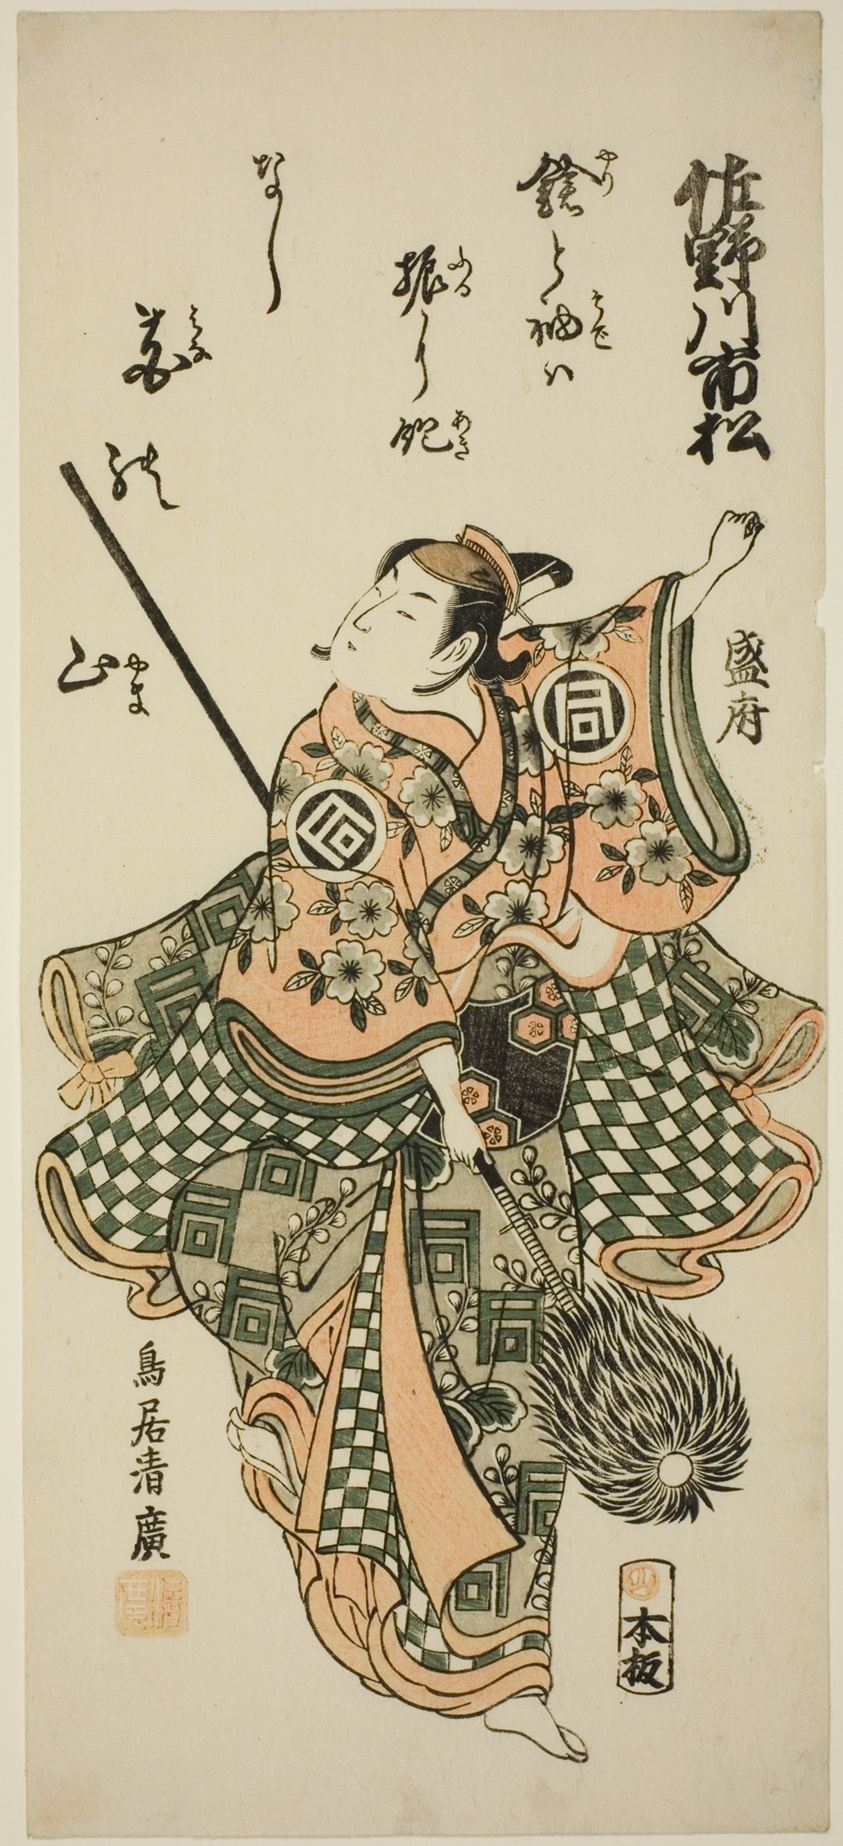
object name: Print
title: The Actor Sanogawa Ichimatsu I performing the spear dance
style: Japanese (culture or style)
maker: Torii Kiyohiro (Japanese, active c. 1737-76)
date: c. 1756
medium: Color woodblock print; o-hosoban, benizuri-e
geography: Japan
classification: woodblock print; print; asian art